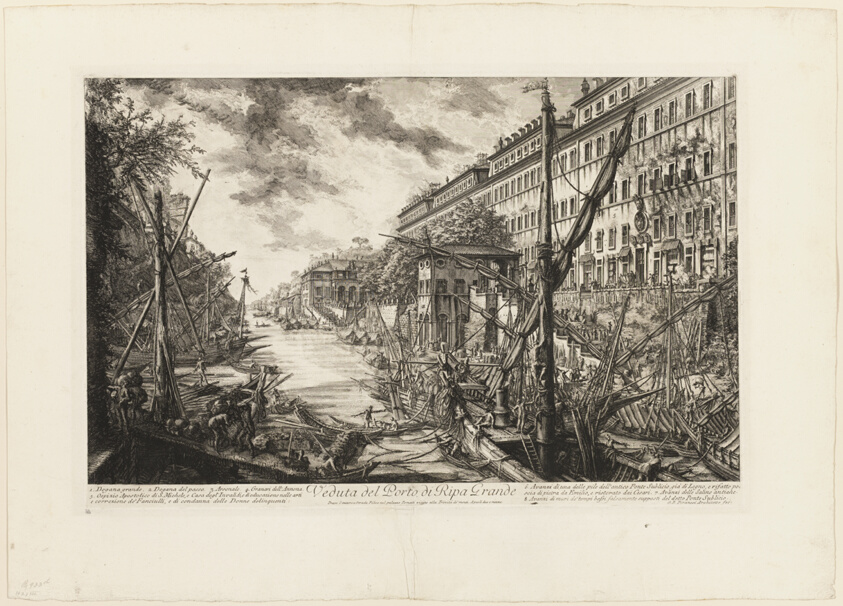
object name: Print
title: View of the Port of Ripa Grande, from Views of Rome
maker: Giovanni Battista Piranesi (Italian, 1720-1778)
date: 1750/59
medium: Etching on heavy ivory laid paper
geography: Italy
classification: etching; print; prints and drawing